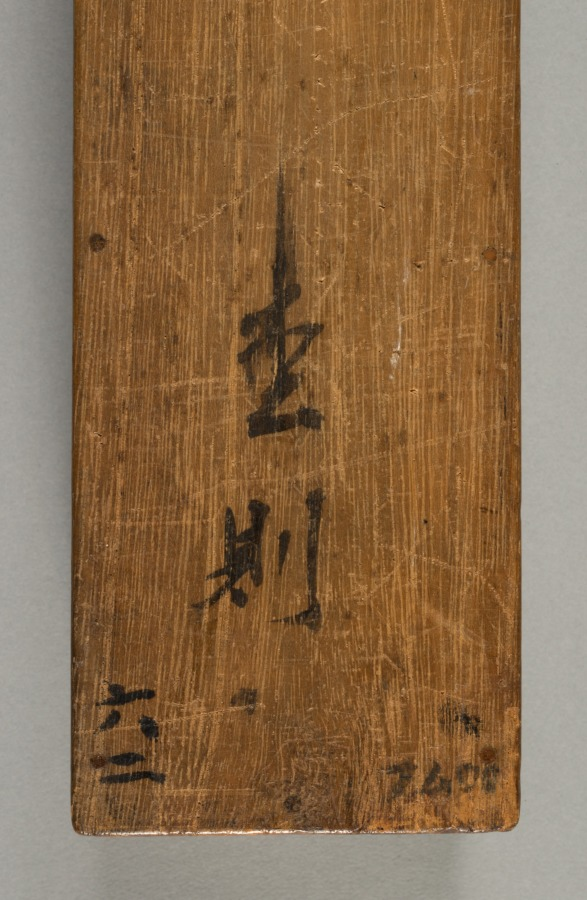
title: Ducks and Reeds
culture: Japan, Momoyama period (1573-1615) to Edo period (1615-1858)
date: early 1600s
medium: hanging scroll; ink on paper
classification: Painting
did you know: This painting was produced by a member of the Kano school.